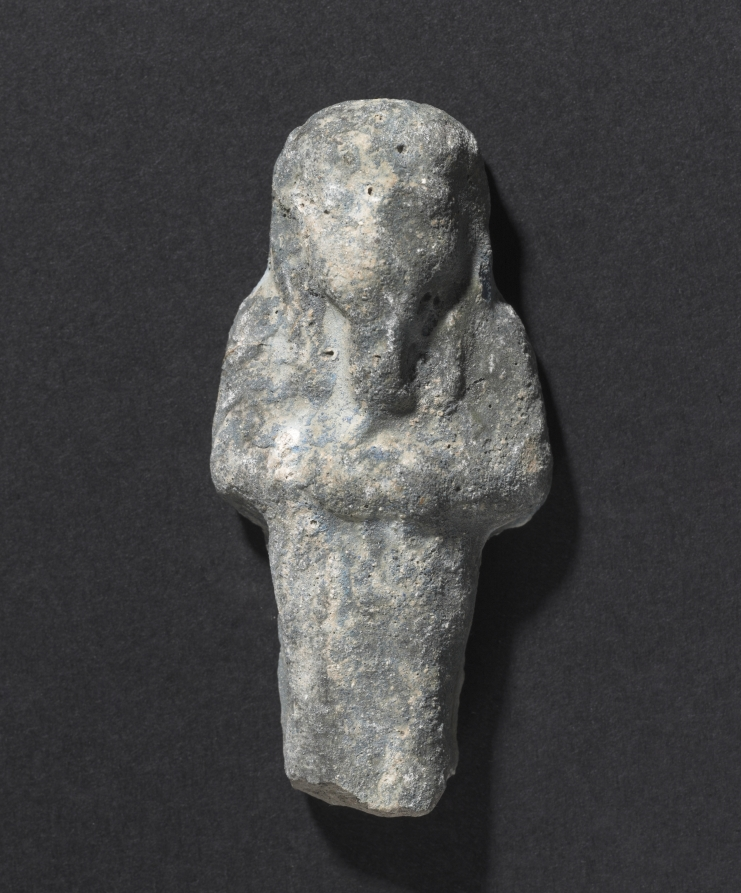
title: Shawabty of Ditamenpaankh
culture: Egypt, Late period (715–332 BCE), Dynasty 25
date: 715–656 BCE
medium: terracotta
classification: Funerary Equipment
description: High demand for shawabtys in the Late Period, a time when as many as 400 or more shawabtys were placed in the tomb with the deceased, gave rise to a specialized container for storing them: the shawabty box. This example is inscribed for the lady of the house, Ditamenpaankh, and was probably one of a pair originally made for her. The single-masted boat on the box's lid is perhaps an allusion to the pilgrimage of the deceased to the holy city of Abydos, the cult city of Osiris, king of the dead. The shawabtys inside are crude, mass-produced examples cast in an open mold. Made of terracotta, their blue paint imitates more costly shawabtys made of faience. As for the shawabty spell, it has been removed from its traditional location on the shawabty's front and relocated onto the sides of box, where it needed only to be written once, thus expediting production.